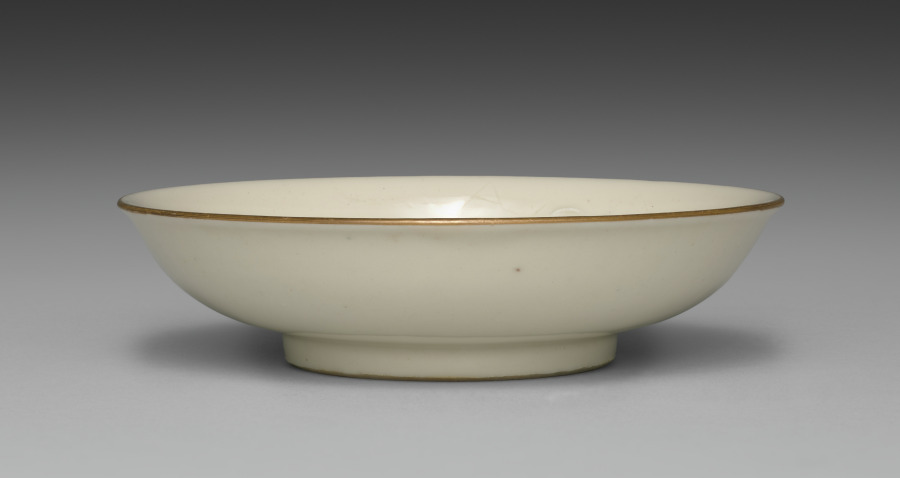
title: Small Dish from Dining Set with Plum Blossoms and Cracked-Ice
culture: Japan, Meiji period (1868–1912)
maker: Seifū Yohei II (Japanese, 1844–1878)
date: c. 1875–78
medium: Porcelain with molded designs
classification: Ceramic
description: Each item in this set has a delicate low-relief design of flowering plum branches over scattered, intersecting lines meant to resemble the cracked-ice surface of a frozen body of water and is signed on the base in gold pigment. While Yohei II produced many fine works in underglaze blue, like those produced by Kiyomizu Shichibei, he also made works in quite different styles later in his career, from the early 1870 s. In 1873, he was appointed purveyor to the Industrial Center of Kyoto Prefecture, a designation associated with Kyoto’s efforts to reach an international market through the port of Kobe; and from 1875 until his death, he was involved in national-level projects to present Japanese ceramics across the world. It was during this period that Yohei III was apprenticed to Yohei II, and it has been suggested that this set may in fact be an early example of Yohei III’s work, which he signed with his teacher’s name. Decorated with flowers resembling Japanese textile motifs, the set calls to mind the design of Yohei II’s pair of vases with plum blossoms in the Victoria and Albert Museum. Here, the elaborate trees created for a formal public exhibition setting have been translated into the approachable blossoms of the genteel domestic environment. While the designs are consistent across the pieces, each raised flower petal and pistil and each incised line in the ice was done by hand, so the cups, bowls, and dishes are similar yet unique. The bottoms of two boxes once identified the set’s owner, but the information has been deliberately obscured with black ink. However, inscriptions still visible appear to indicate two occasions, once at the end of July 1886 , and once again in June 1916 , when parts of the set were requested from Hokura in Niigata Prefecture. The location corresponds to a neighborhood in the present-day city of Jōetsu. The surname Tsuji 辻 also appears on a paper tag affixed to one of the box cloths. Future research may possibly reveal more about their provenance. A vase by Yohei III in a private collection combines the formal grandeur of the Yohei II vases in the Victoria and Albert Museum with the gentler design of this dining set, placing flowering plum trees against soft, scalloped-edge clouds resembling those in golden screens.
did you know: The dining wares have a creamy white coloration that the four boxes containing them identify as Korean in style.